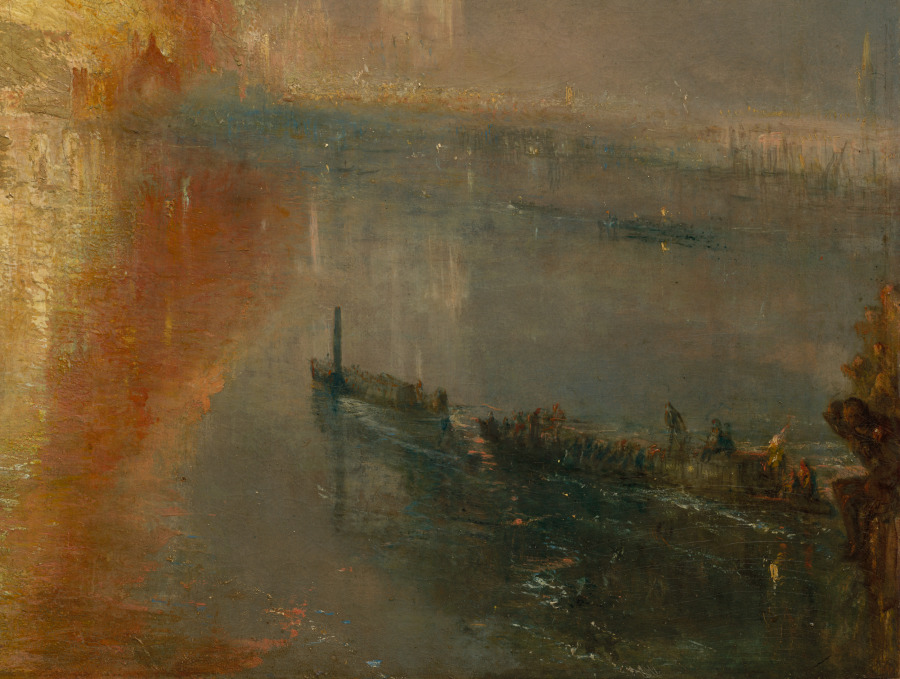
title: The Burning of the Houses of Lords and Commons, 16 October 1834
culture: England, 19th century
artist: Joseph Mallord William Turner (British, 1775–1851)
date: 1835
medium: oil on canvas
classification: Painting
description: Fire consumed London’s famous Houses of Parliament on the night of October 16, 1834, and people gathered along the banks of the river Thames to gaze in awe at the horrifying spectacle. Initially, a low tide made it difficult to pump water to land and hampered steamers towing firefighting equipment along the river. The blaze burned uncontrollably for hours. J. M. W. Turner records the struggle as the boats in the lower-right corner head toward the flames. Although Turner based the painting on an actual event, he magnified the height of the flames, using the disaster as the starting point to express man’s helplessness when confronted with the destructive powers of nature. Brilliant swathes of color and variable atmospheric effects border on abstraction.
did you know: Turner painted two versions of this event. Cleveland's painting views the fire downriver, from the southeast bank of the Thames, while the second version at the Philadelphia Museum of Art views the fire from directly across Westminster Bridge.